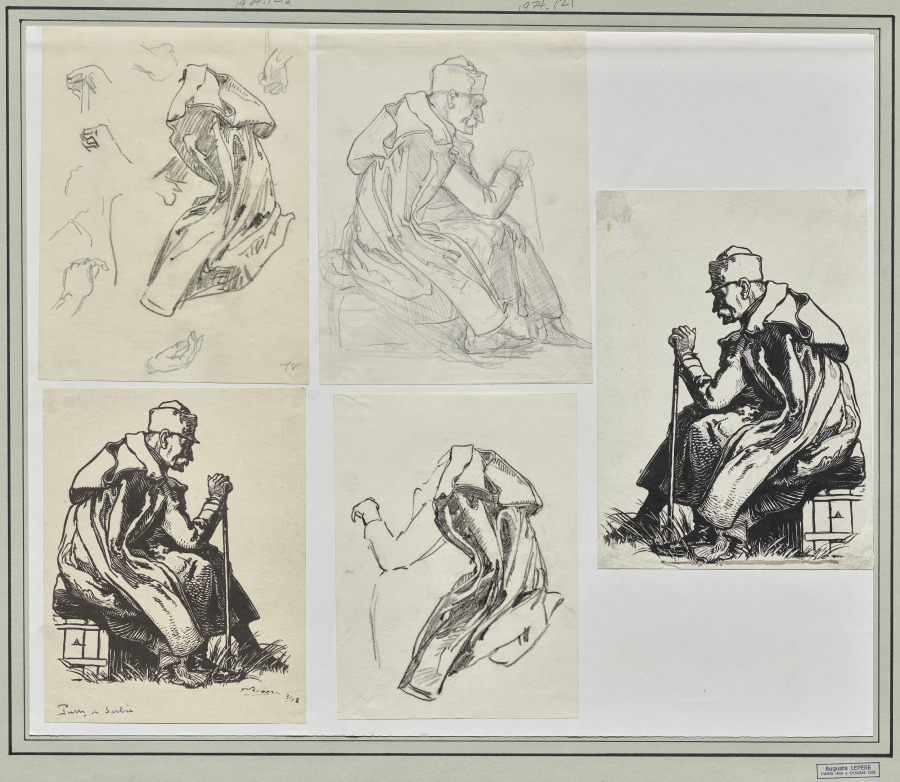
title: Le roi Pierre de Serbie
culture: France, 20th century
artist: Auguste Louis Lepère (French, 1849–1918)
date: 1914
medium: pencil with touches of black crayon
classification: Drawing